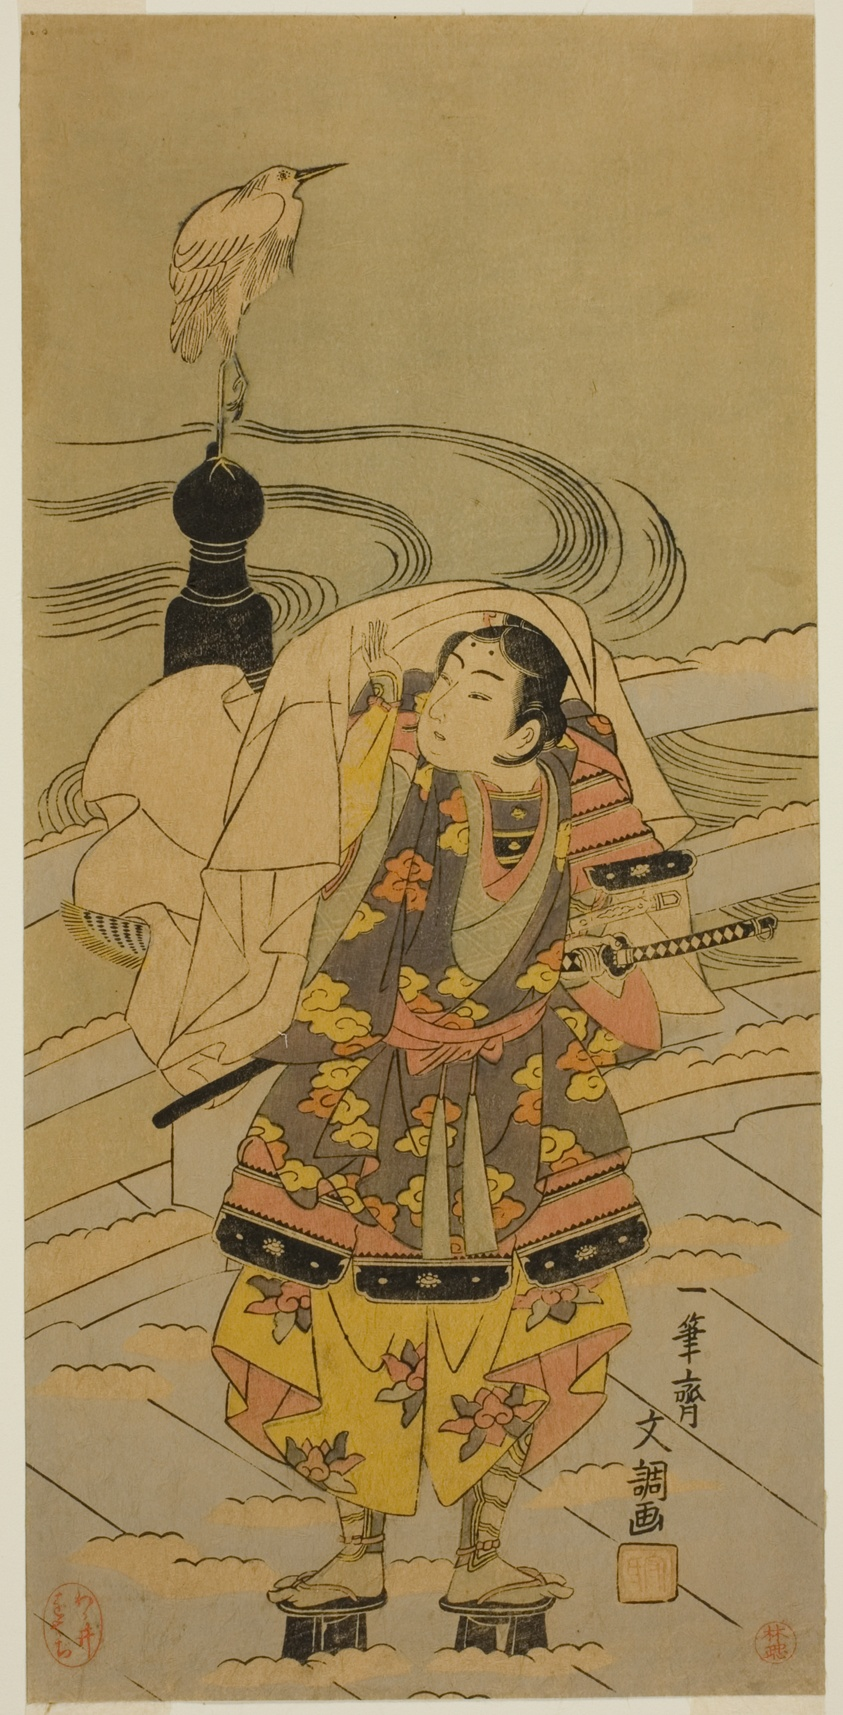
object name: Print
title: Ushiwaka-maru on the Gojo Bridge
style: Japanese (culture or style)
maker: Ippitsusai Buncho (Japanese, active c. 1755-90)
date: reprint of c. 1769 design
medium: Color woodblock print; hosoban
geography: Japan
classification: woodblock print; print; asian art